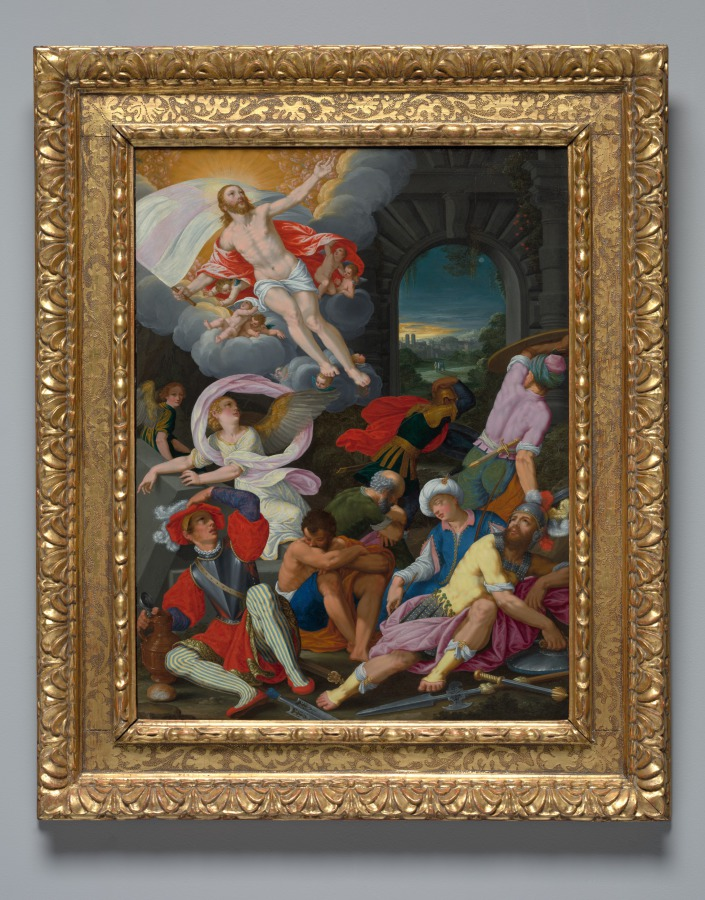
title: The Resurrection of Christ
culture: Germany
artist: Johann König (German, 1586–1642)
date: 1622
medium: oil on copper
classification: Painting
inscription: Signed and dated lower left: Johan. : König / 1622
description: According to Christian belief, three days after his death by crucifixion, Christ rose from the dead and ascended into heaven. König’s interpretation of this traditional theme employs vivid colors and explosive poses to express the drama of the event. Meticulous brushwork delineates exquisite details, and draws attention to the luminous landscape and the three holy women hastening towards Christ’s vacant tomb.